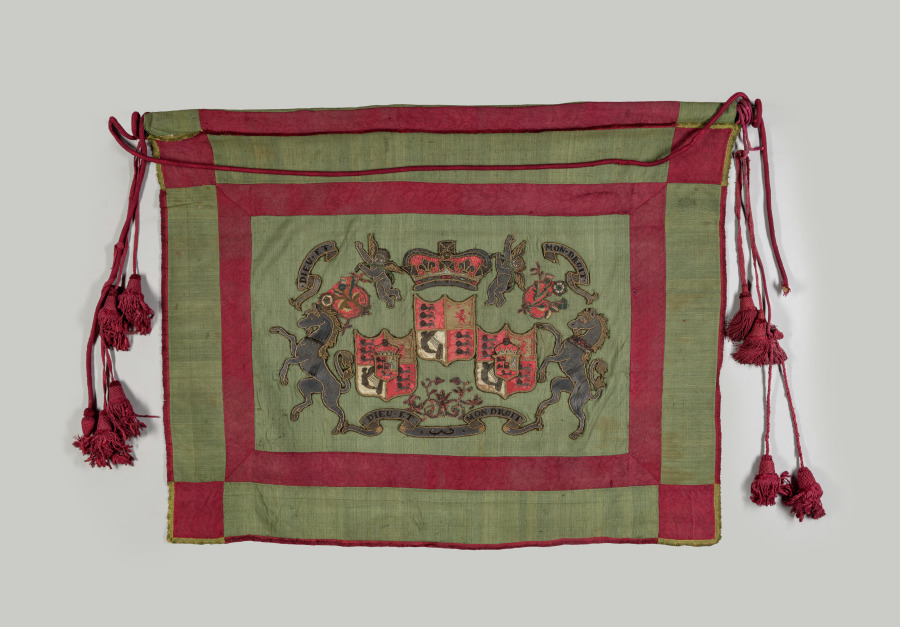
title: Banner with Royal Coat of Arms of Great Britain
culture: Great Britain, probably England, 18th century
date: 1700s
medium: green silk ground with embroidery; crimson cords and tassels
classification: Textile